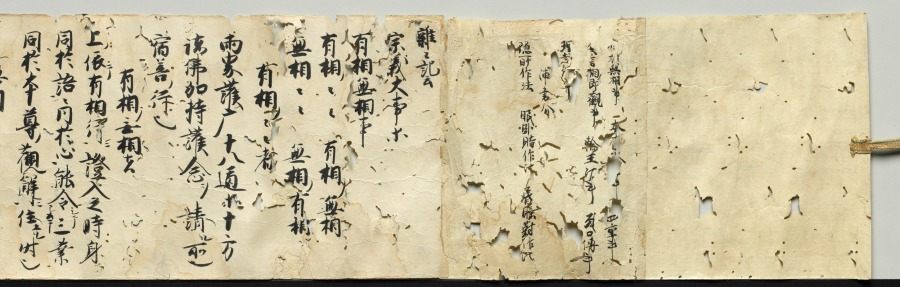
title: Scroll of Miscellaneous Notes written on a Calendar by Priest Seigen (recto)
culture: Japan, Kamakura period (1185–1333)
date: c. 1200–1231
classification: Manuscript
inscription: bears miscellaneous notes written by Priest Seigen.